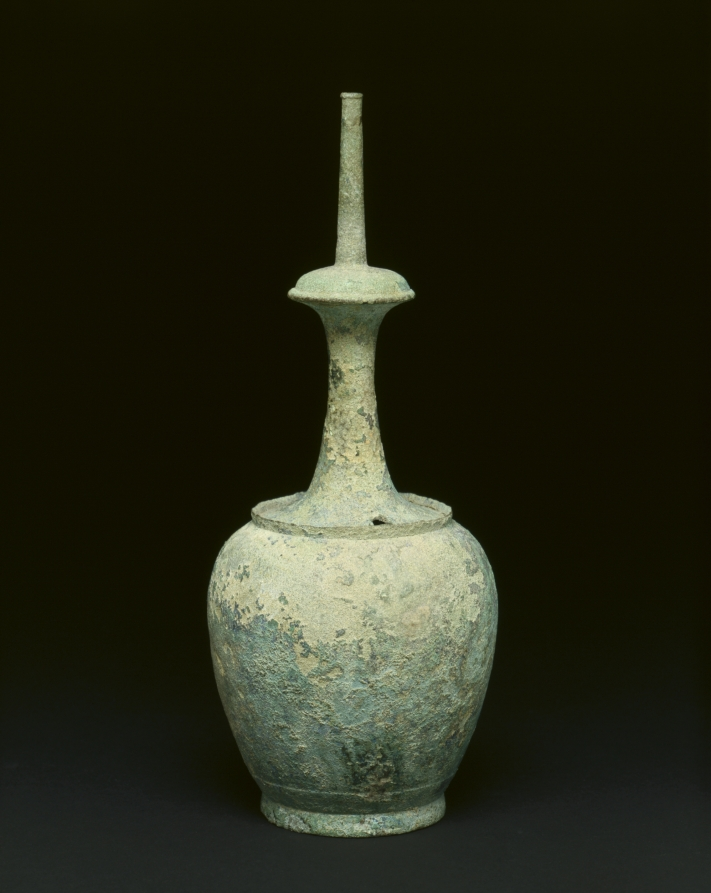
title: Water Ewer for Rituals (Kundika)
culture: Korea, Goryeo dynasty (918–1392)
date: 1100s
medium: bronze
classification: Metalwork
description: Known as kundika in Sanskrit, this distinctively shaped vessel served to purify a sacred space and to invoke a deity. In Korean Buddhist art, it appears primarily as an attribute of the Bodhisattva Avalokitesvara (Gwaneum in Korean). By the 12th century, however, it came to serve as aristocrats’ fancy water container for everyday use.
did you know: This distinctively shaped vessel is called a kundika in Sanskrit, simply referring to a water bottle.